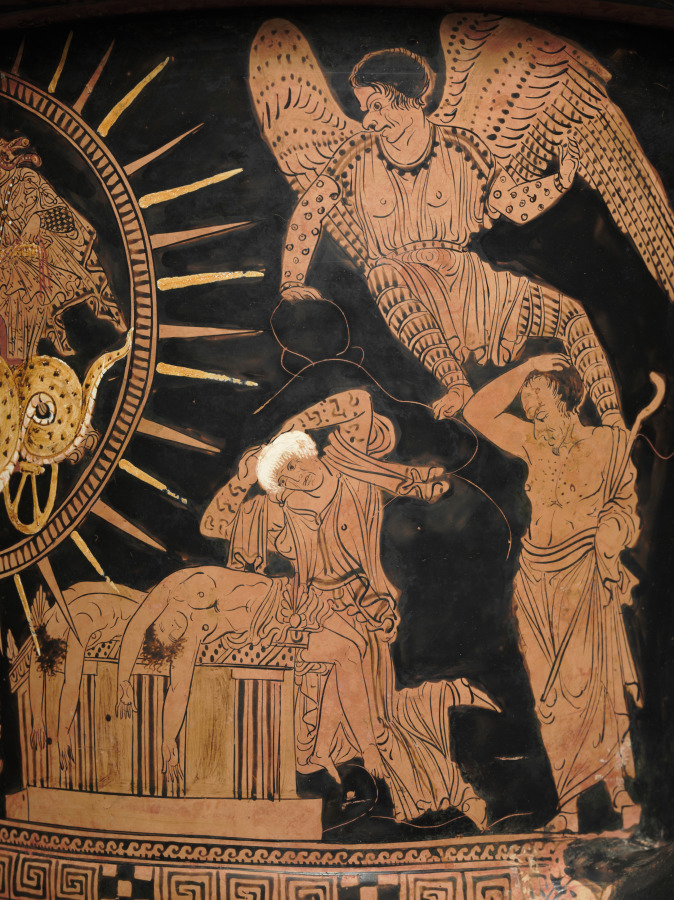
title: Red-Figure Calyx-Krater (Mixing Vessel): Medea in Chariot (A); Telephos with Baby Orestes (B)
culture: South Italian, Lucanian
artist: near the Policoro Painter (South Italian, Lucanian, active c. 400 BCE)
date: c. 400 BCE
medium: ceramic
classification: Ceramic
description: The remarkable scene on the front of this vase relates to the famous tragedy Medea, written by Euripides and first produced in Athens in 431 BC. Framed in the center by a halo (recalling her sun god grandfather Helios), the sorceress Medea flies off in a dragon-drawn chariot. Seeking revenge against her husband Jason, leader of the Argonauts, Medea has just slain their two children. Two Furies flank her, while Jason and a distraught nurse and teacher approach the bodies on the altar below. A different tragedy unfolds on the other side of the vase, from Euripides’s Telephos (438 BC). The wounded warrior Telephos holds the baby Orestes hostage at an altar, with Agamemnon and Clytemnestra rushing to save their son.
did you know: This vase includes scenes connected to two Athenian tragedies dealing with children—Medea and Telephos.